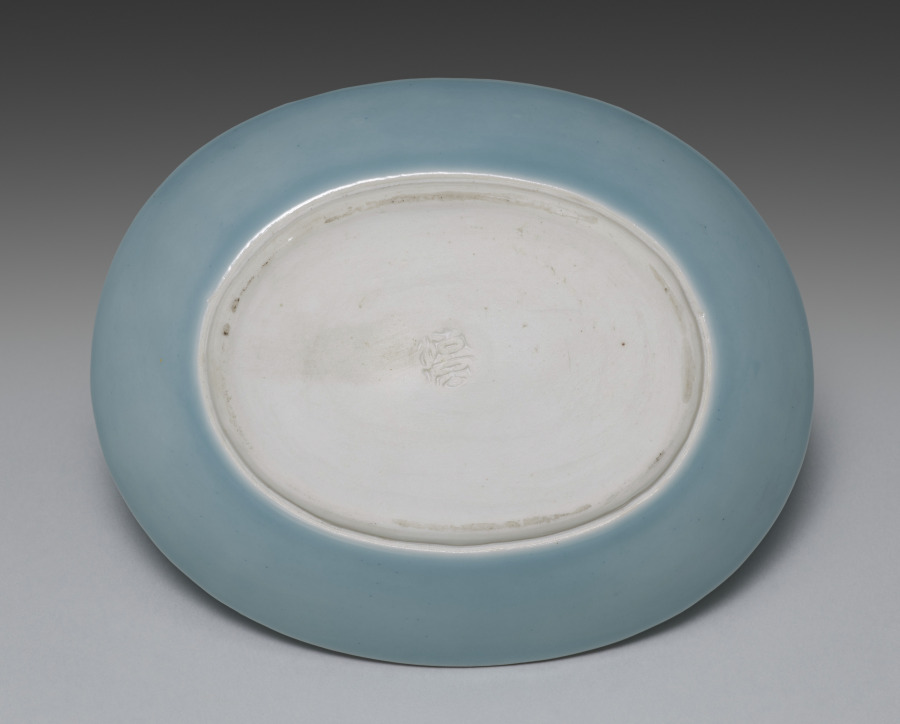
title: Dish from Dishes with Shells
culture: Japan, Taishō period (1912–26)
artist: Seifū Yohei IV (Japanese, 1872–1951)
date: 1914–46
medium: One from a set of five dishes; porcelain with blue glaze, iron oxide, and molded design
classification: Ceramic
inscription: 清風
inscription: 清風造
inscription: 清風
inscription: 成山清風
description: Yohei IV chose an aquatic theme for this set of five mukōzuke, side dishes. He added an iron oxide rim and used a concentrated blue glaze on both the interior and exterior. The glaze, named on the box lid, is his father’s “evening moon” (tsukiyoi) color. The conch in relief takes up the entire bottom of the dish. Up the sides are two snails on one end and on the other a scallop. This results in a boldly graphic, less realistic effect.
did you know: This set of dishes, mukōzuke, could be used for serving small side dishes at a tea gathering.